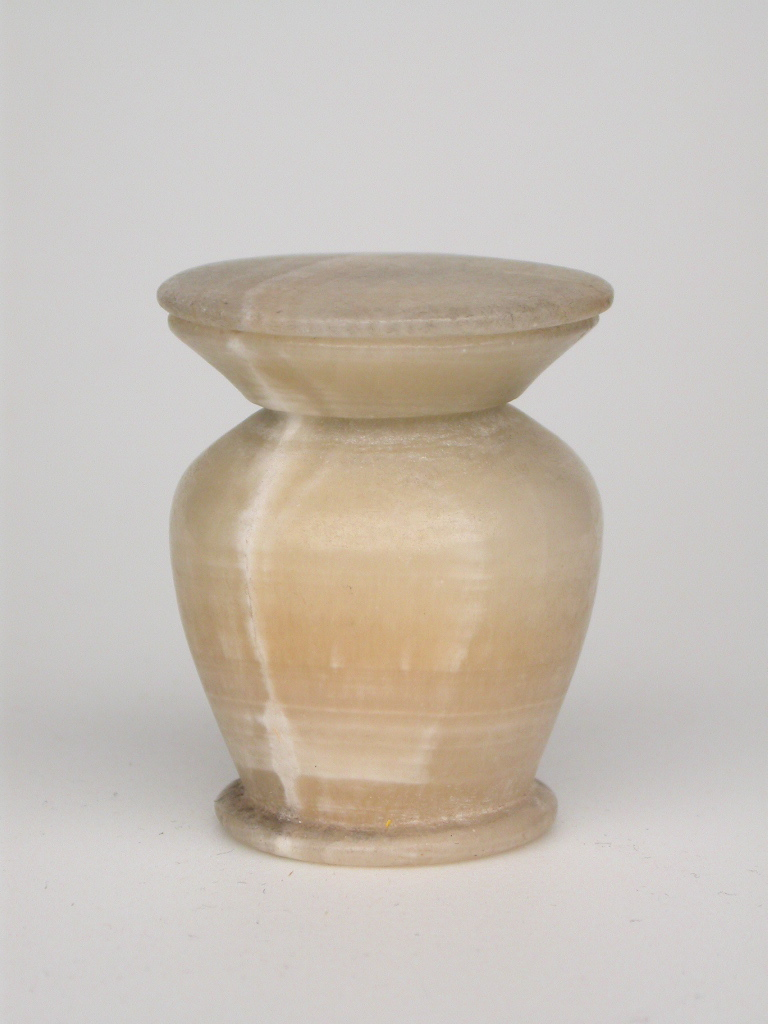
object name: Vessel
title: Kohl Jar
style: middle kingdom, egyptian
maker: Egyptian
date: Middle Kingdom, Dynasty 11–12 (about 2055–1773 BCE)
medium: Travertine (Egyptian alabaster)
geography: Egypt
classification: personal grooming / hygiene / cosmetic container; vessel; ancient art; container